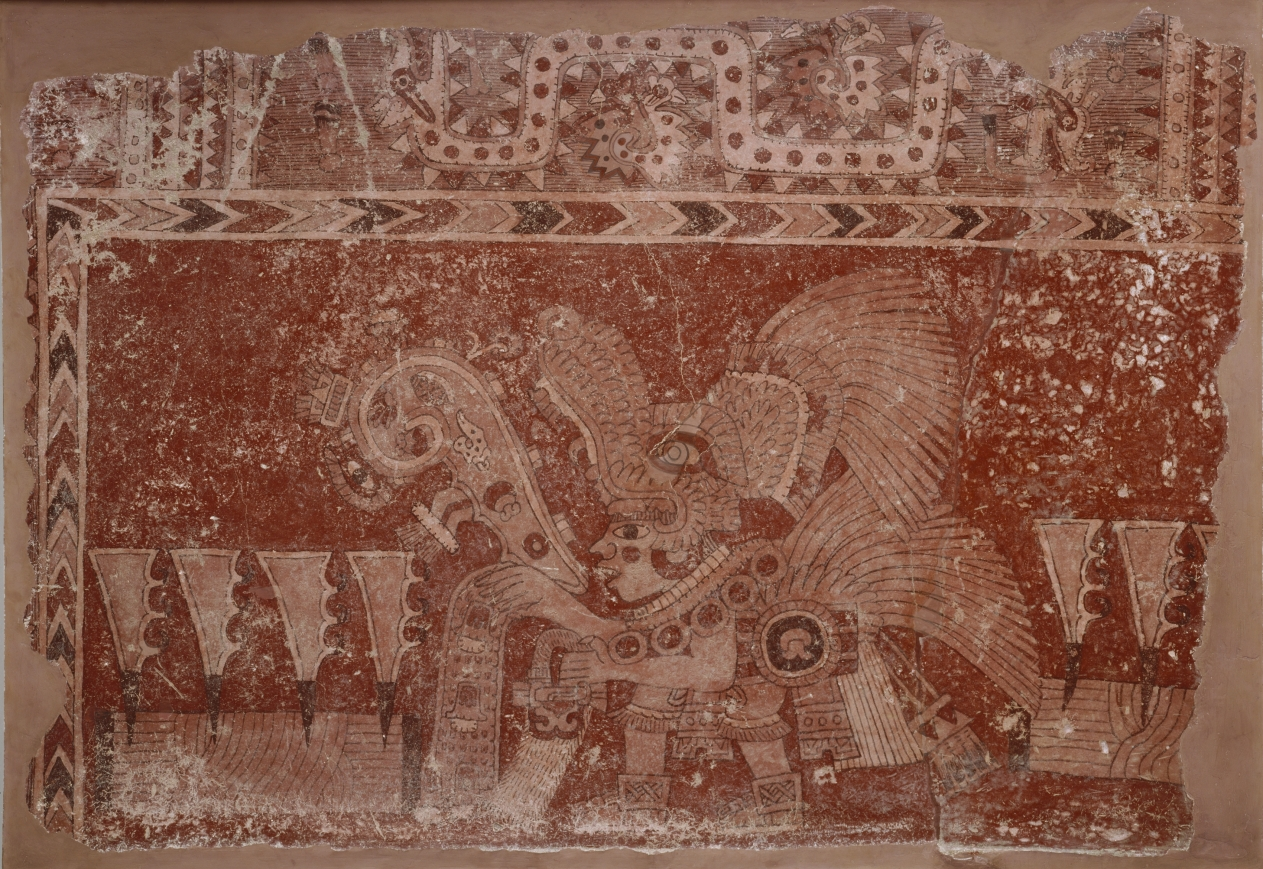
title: Mural Fragment with Elite Male and Maguey Cactus Leaves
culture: Central Mexico, Tlacuilapaxco apartment compound(?), Teotihuacán style, Classic Period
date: 500–550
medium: fresco on wall fragment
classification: Painting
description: This richly dressed elite male belonged to a row of identical figures who processed along the walls of a patio in one of Teotihuacán’s wealthy apartment compounds. He offers a chant or prayer, materialized in a mouth scroll, along with a flower-filled libation that cascades from one hand. In the other hand, he carries an incense bag. The thorny spines of the maguey cactus, in front and behind, may allude to the offering of precious blood and a ritual beverage made from the cactus’s sap (pulque, a less refined form of tequila). The spines are thrust into objects that may represent bundles or plots of land.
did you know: This fragment is from a larger composition that covered the walls of a patio at Teotihuacan.